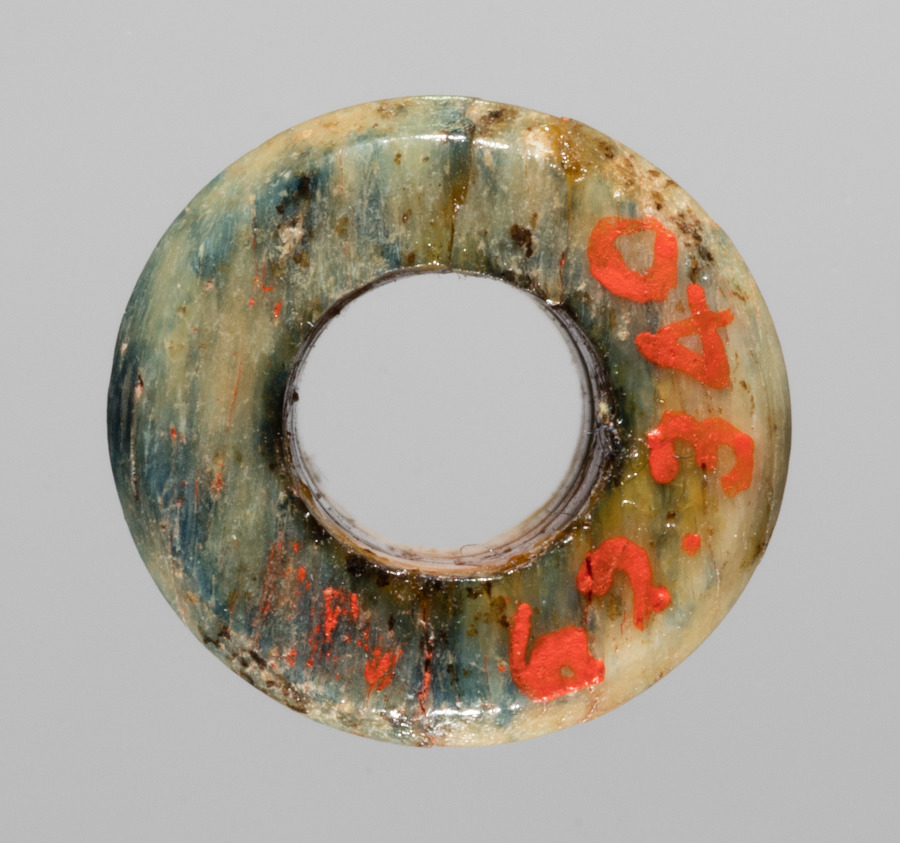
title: Spindle Whorl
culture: Iran, early Islamic period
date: 700s - 900s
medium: bone, incised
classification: Spindle Whorl